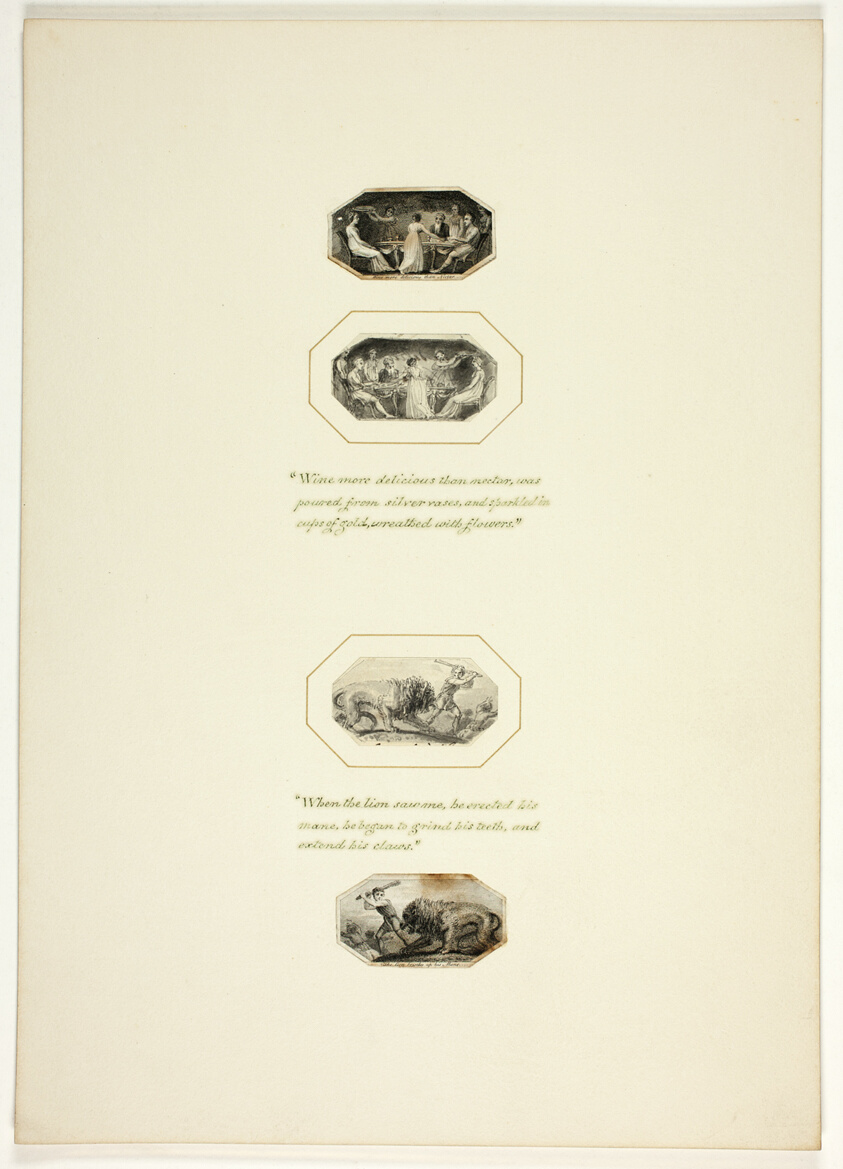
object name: Print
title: Plate from Telemachus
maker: after Thomas Stothard (English, 1755-1834); published by T. Baker (English, 19th century)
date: c. 1797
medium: Engraving on paper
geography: England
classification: engraving; drawings (visual works); prints and drawing; print